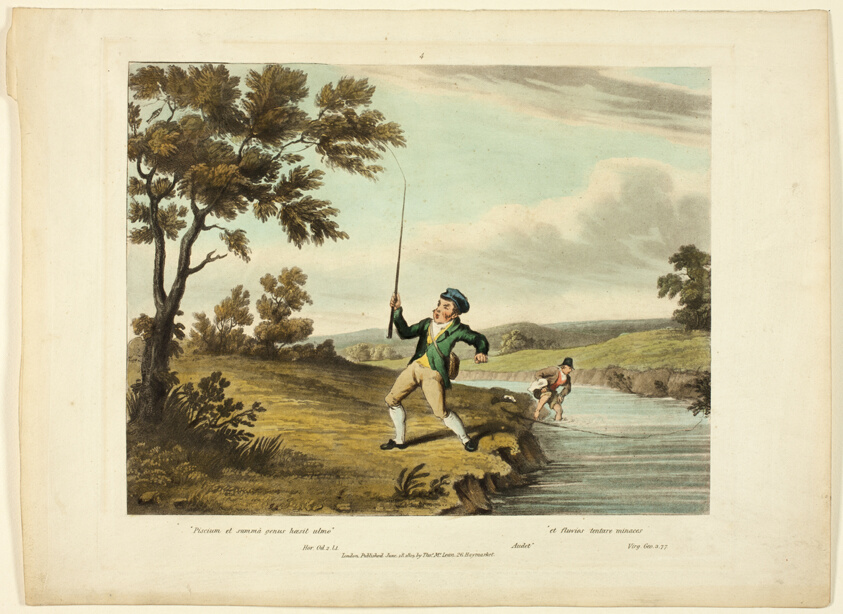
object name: Print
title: The Finest Perch is Not for Me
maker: Charles Turner (English, 1773-1857); after Sir Robert Frankland (English, 1784-1849); published by Thomas McLean (English, active c.1790-1860)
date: published June 18, 1825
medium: Hand-colored aquatint and engraving on ivory wove paper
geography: England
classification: aquatint; print; prints and drawing